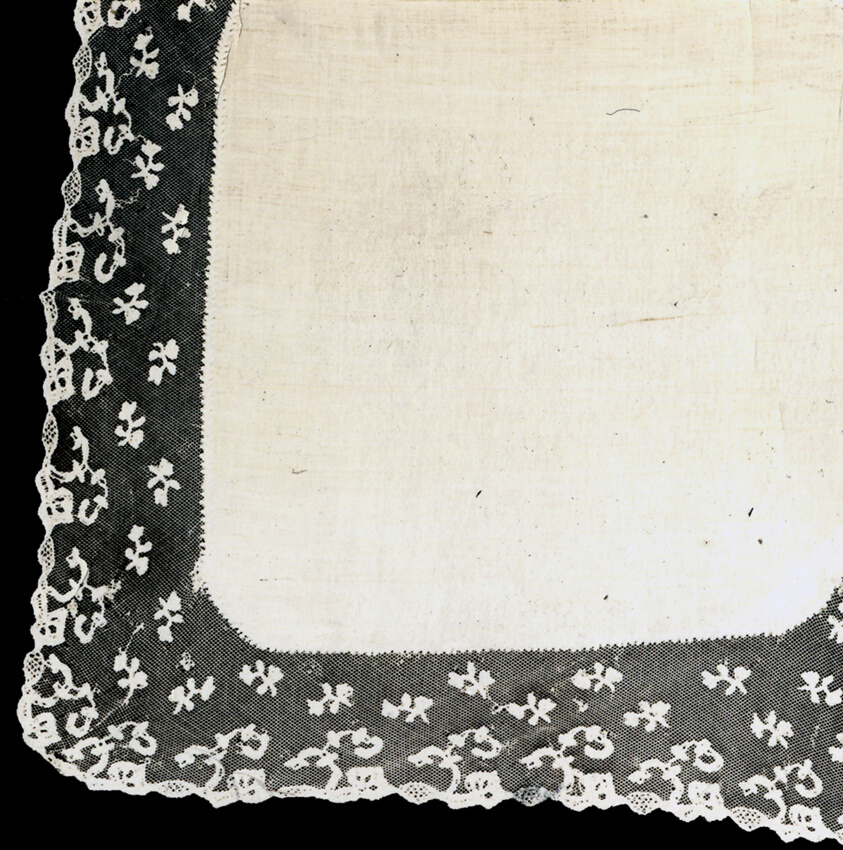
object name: Textile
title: Handkerchief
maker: Probably Belgium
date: 1850/75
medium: Linen, plain weave; embroidered in padded overcast and padded satin stitches; edged with mixed lace known as "Brussels application lace:" bobbin lace applied to machine-made net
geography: Belgium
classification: textile; lace - mixed